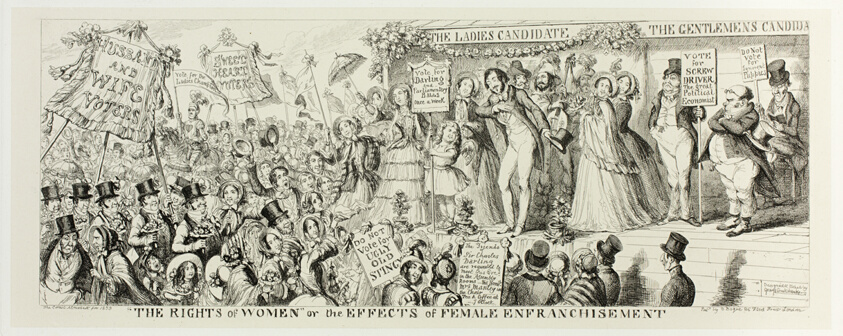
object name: Print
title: "The Rights of Women" or the Effects of Female Enfranchisement from George Cruikshank's Steel Etchings to The Comic Almanacks: 1835-1853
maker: George Cruikshank (English, 1792-1878); published by Pickering & Chatto (English, 19th century)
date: 1853, printed c. 1880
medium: Steel etching in black on cream India paper, laid down on off-white card (chine collé)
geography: England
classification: etching; paper; steel; print; prints and drawing